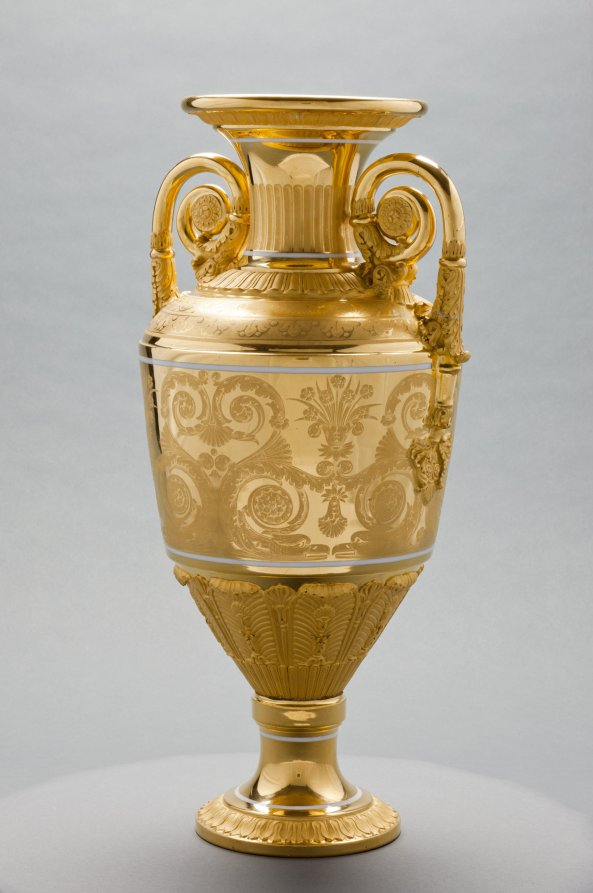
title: Vase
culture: Russia, St. Petersburg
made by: St. Petersburg Imperial Porcelain Factory (Russian)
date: c. 1820–1830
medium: gilt porcelain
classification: Ceramic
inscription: inscribed: "Moreau" in gold near lip.